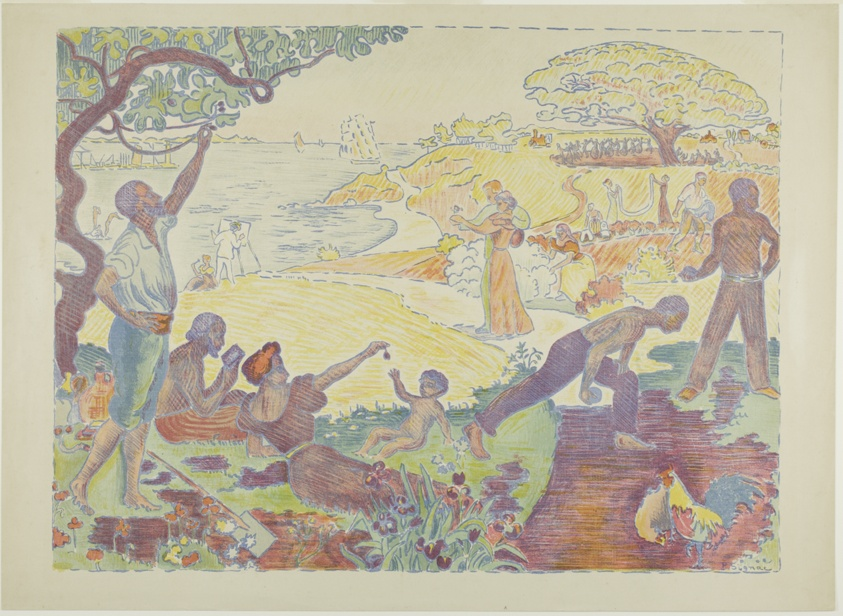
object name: Print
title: In Times of Harmony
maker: Paul Signac (French, 1863-1935); printed by Tailliardat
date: 1895–96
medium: Color Lithograph in green, blue, yellow, red, and peach with scraping on plate, from a zinc plate on buff wove paper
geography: France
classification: lithograph; print; prints and drawing